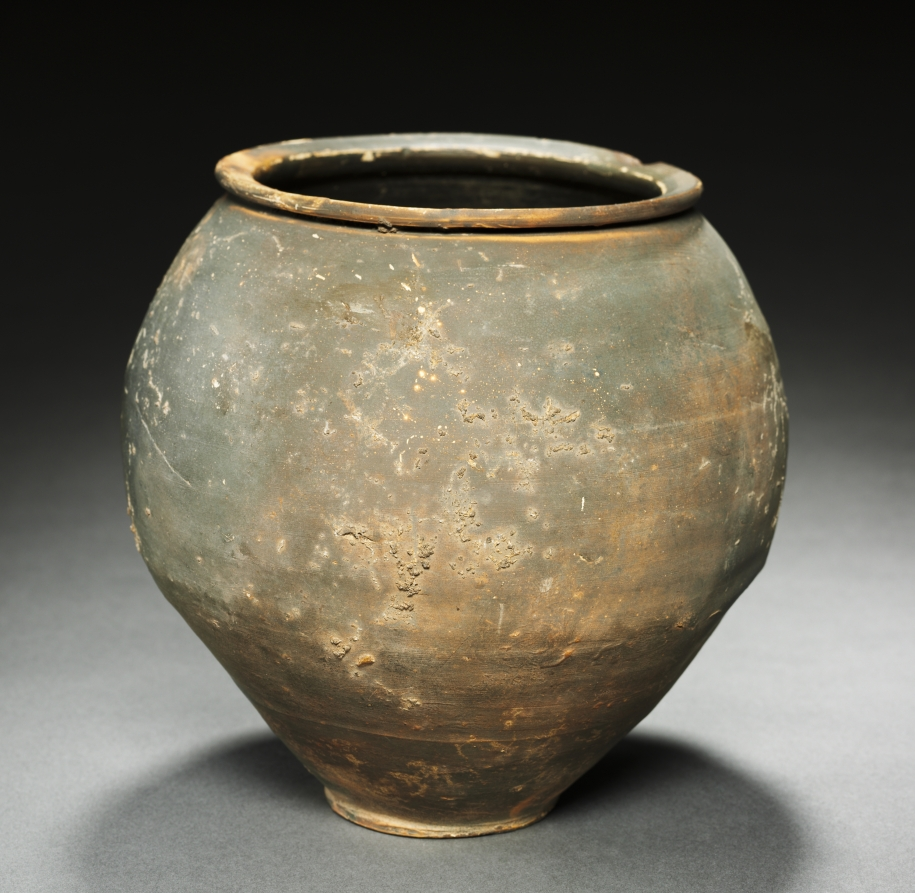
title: Face Urn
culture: Rhenish (Cologne), Gallo Roman, 2nd quarter, 1st Century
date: 25–50 CE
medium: reddish ware with gray burnished slip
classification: Ceramic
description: This wheel-thrown vase is decorated with humanlike facial features and a phallus applied to the face’s cheek. Wide arching eyebrows meet at the short bridge of the face’s puggy nose, which sits over lips pursed around its protruding tongue. Finger marks can be seen around the eyes and eyebrows where clay was added onto the surface of the vessel to form the facial features.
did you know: The phallus was often used as a protective symbol in the ancient world.